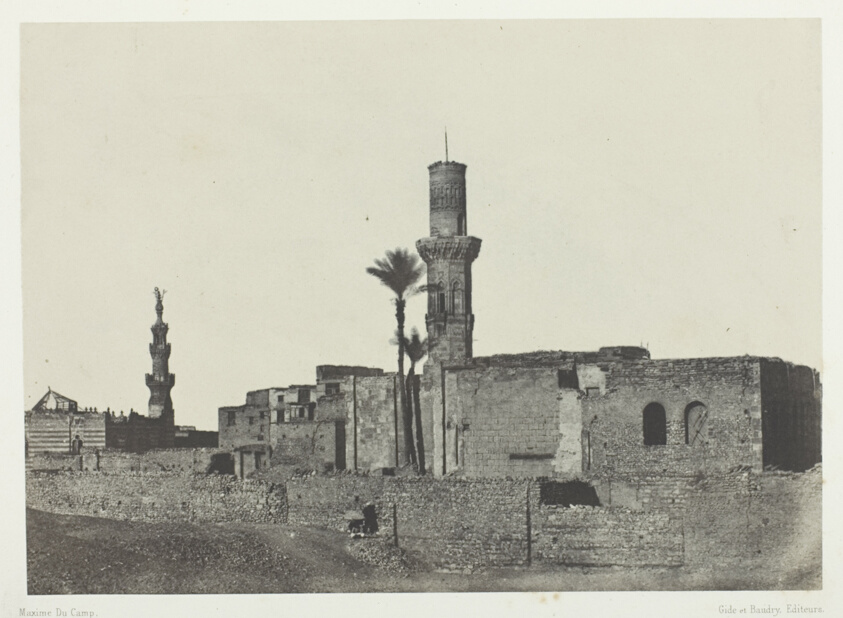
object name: Photograph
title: Mosquée près de Bab-el-Saïda, Le Kaire, plate 2 from the album "Egypte, Nubie, Palestine et Syrie," (1852)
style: 19th century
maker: Maxime Du Camp (French, 1822–1894)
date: 1849/51, printed 1852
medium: Salted paper print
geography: France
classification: salted paper print; photographic process; photography; photograph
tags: Collected by Hugh Edwards, Egypte, Nubie, Palestine et Syrie